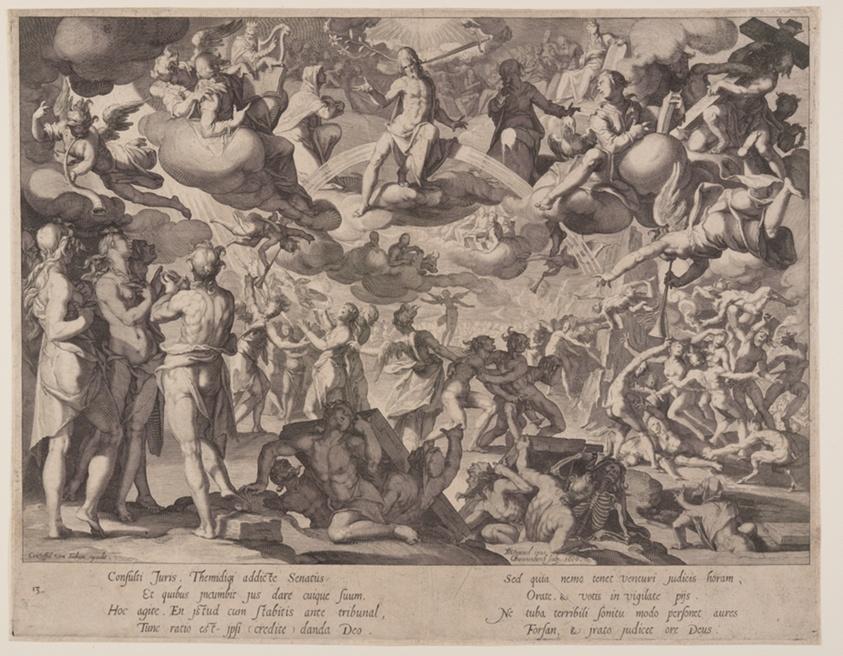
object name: Print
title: Last Judgement, plate 13 from Thrones of Justice (Thronus Iustitiae)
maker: Willem van Swanenburgh (Dutch, 1580–1612); after Joachim Wtewael (Dutch, 1566–1638)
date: 1606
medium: Engraving on ivory laid paper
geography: Netherlands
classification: print; paper; prints and drawing; engraving